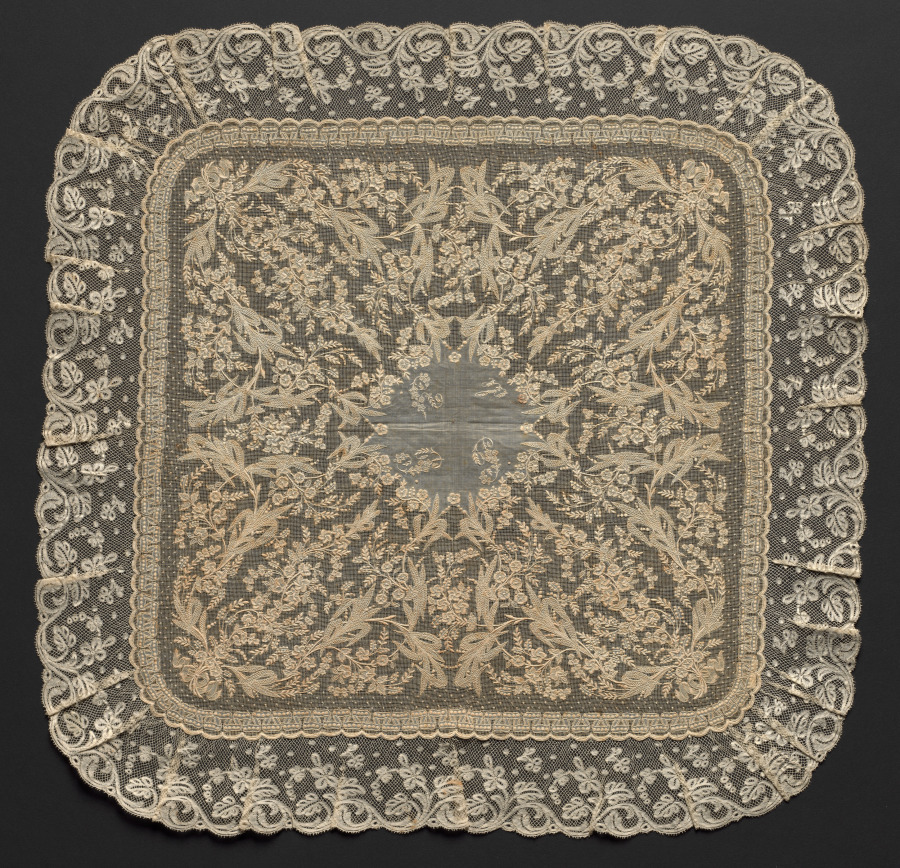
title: Lace Handkerchief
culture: France or Italy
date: 1800s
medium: plain weave linen center with needle lace (drawnwork) surround, bobbin lace (Valenciennes lace) edging, and embroidery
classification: Embroidery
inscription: "P. P. de Y."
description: In the center of this lace handkerchief, the initials P P de Y are embroidered in white.